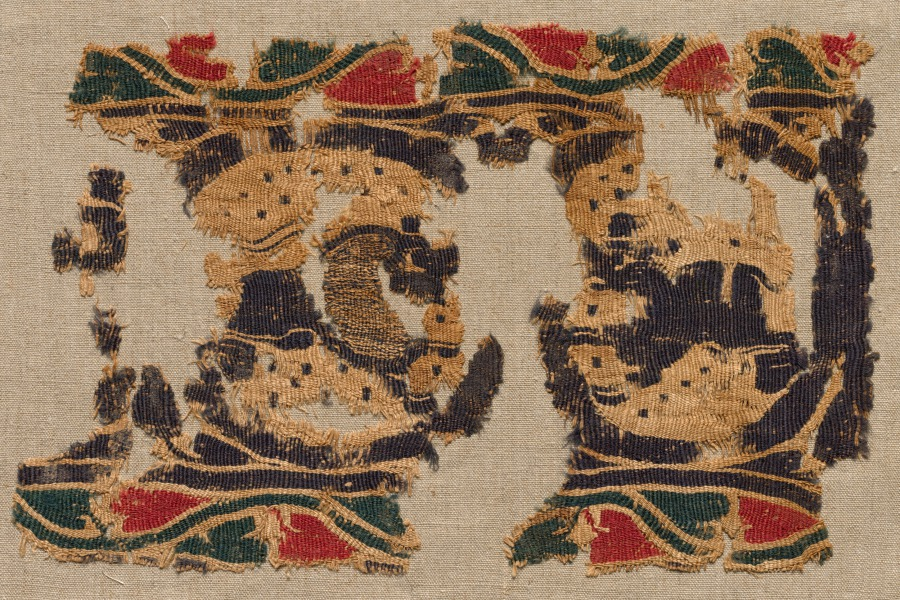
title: Fragment of the Border of a Large Panel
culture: Egypt, Byzantine period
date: late 400s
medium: tapestry (originally inwoven in tabby ground); linen and wool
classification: Textile